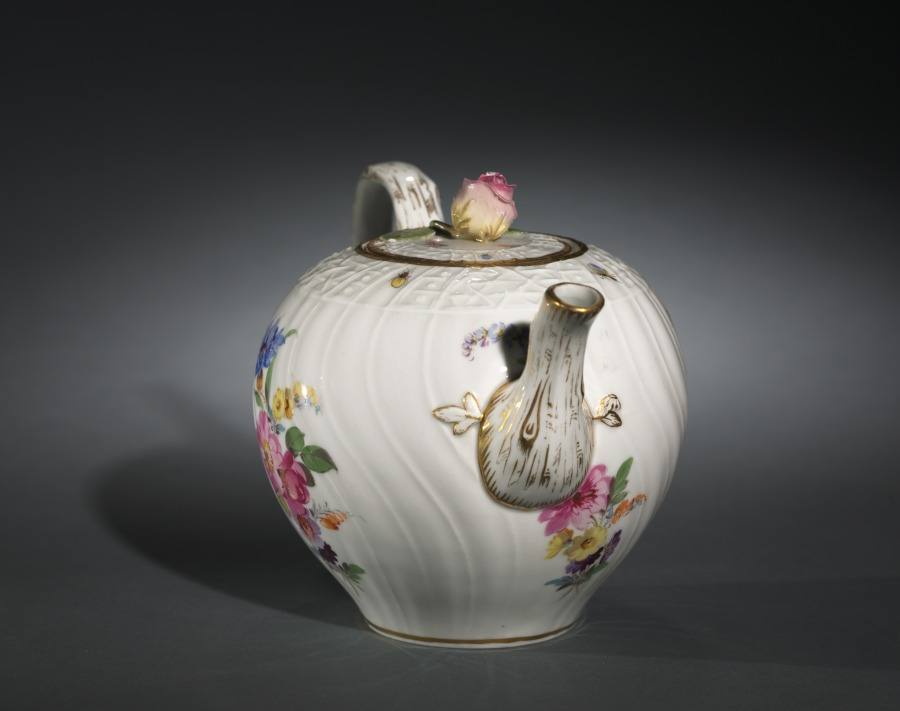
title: Teapot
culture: Germany, Meissen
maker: Meissen Porcelain Factory (German, est. c. 1710)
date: c. 1750–70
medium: porcelain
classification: Ceramic